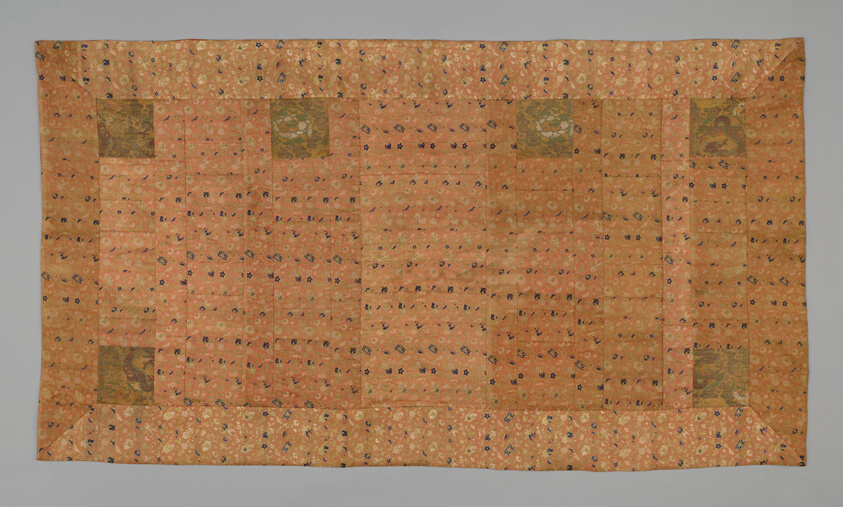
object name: Textile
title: Kesa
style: edo (japanese period), Japanism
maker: Japan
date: Edo period (1615–1868), late 18th century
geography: Japan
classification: textile; costume; liturgical - buddhist; weaving